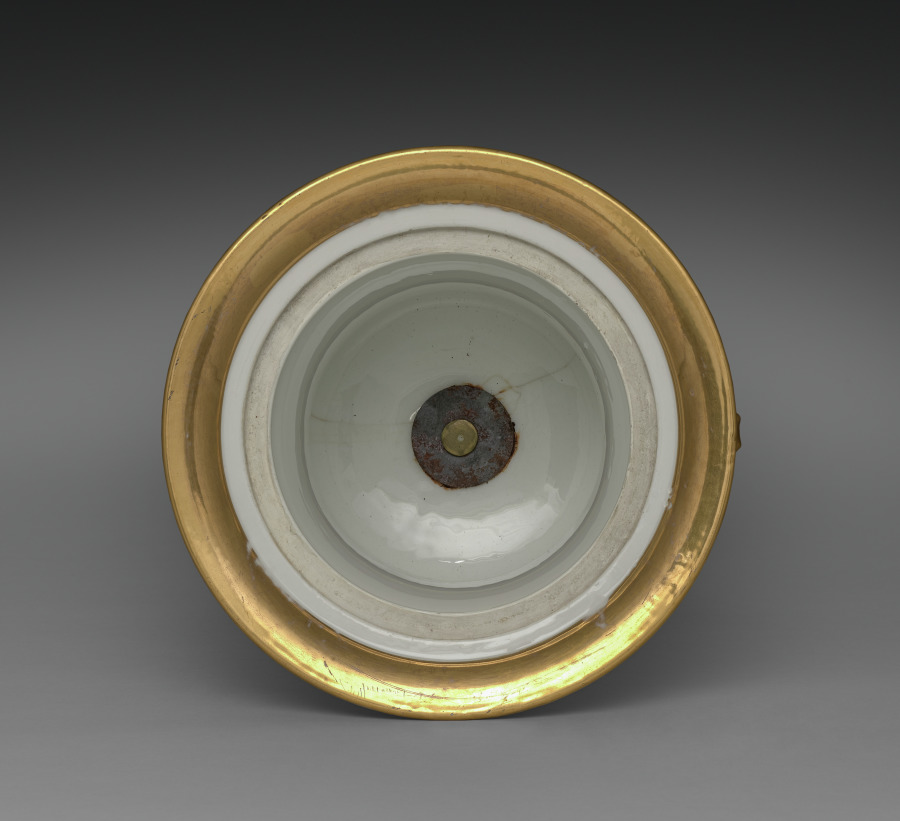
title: Ice Cream Pail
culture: France, Paris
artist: Factory of Jacob-Petit (French, 1830–1865)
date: c. 1840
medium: gilt porcelain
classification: Ceramic